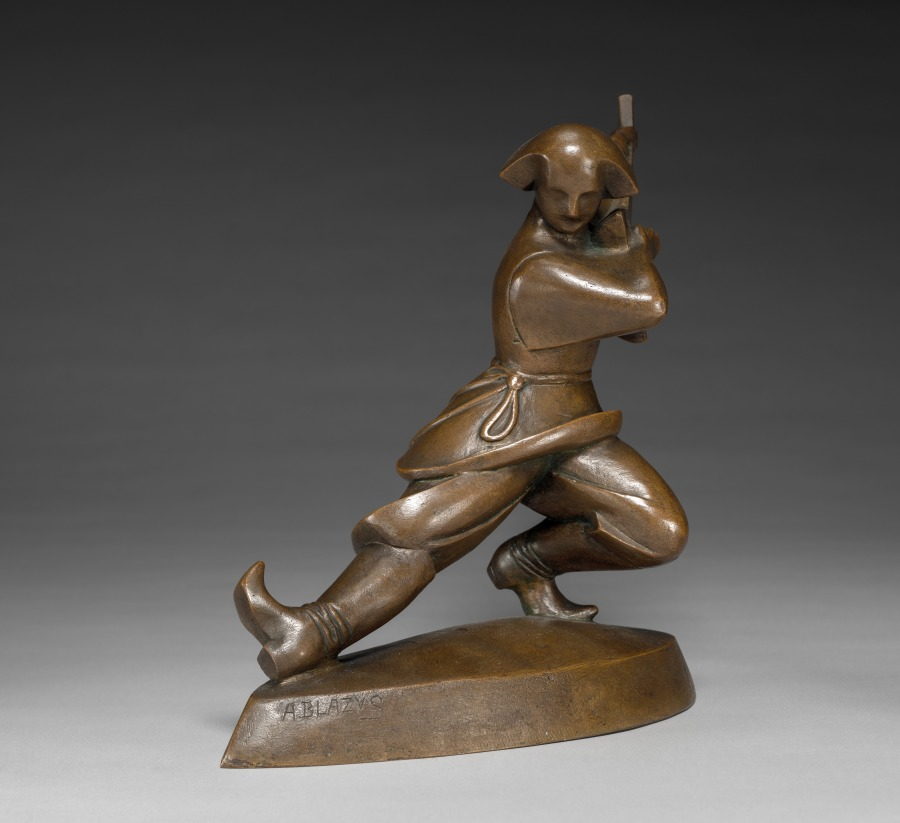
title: Balalaika Player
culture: America, Ohio, Cleveland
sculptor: Alexander Blazys (American, born Russian Empire [now Lithuania], 1894–1963)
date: 1925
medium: bronze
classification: Sculpture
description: A Lithuanian immigrant, Blazys introduced modernist sculpture to Cleveland upon his arrival in 1925. These figures merge rhythmic movement inspired by music with faceted, geometric planes derived from Cubism.